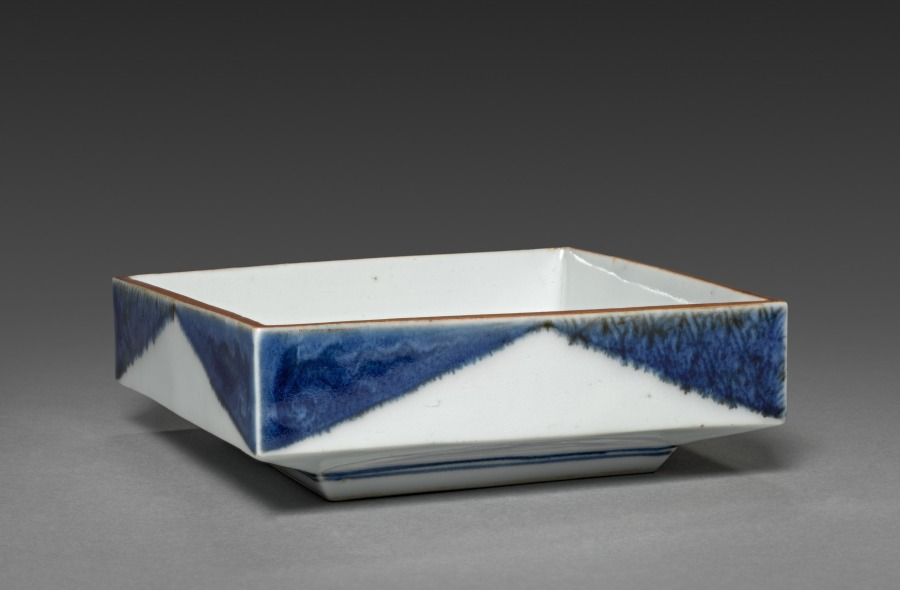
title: Side-Dish with Dandelion in Rocks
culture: Japan, Edo period (1615–1868)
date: 1700s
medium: One of a set of five dishes; porcelain with underglaze blue and overglaze iron oxide (Arita ware, Kutani style)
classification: Ceramic